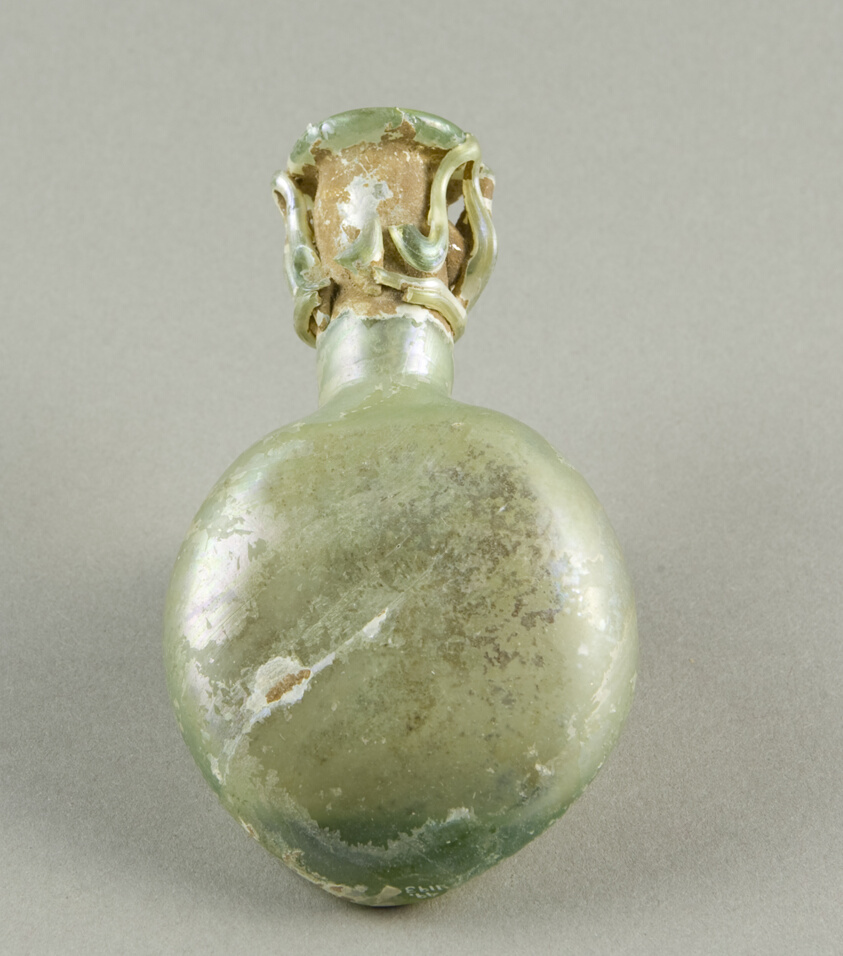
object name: Vessel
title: Flask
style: palestinian, syrian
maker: Ancient Mediterranean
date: 4th century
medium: Glass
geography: Syria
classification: glass; vessel; ancient art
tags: vessels